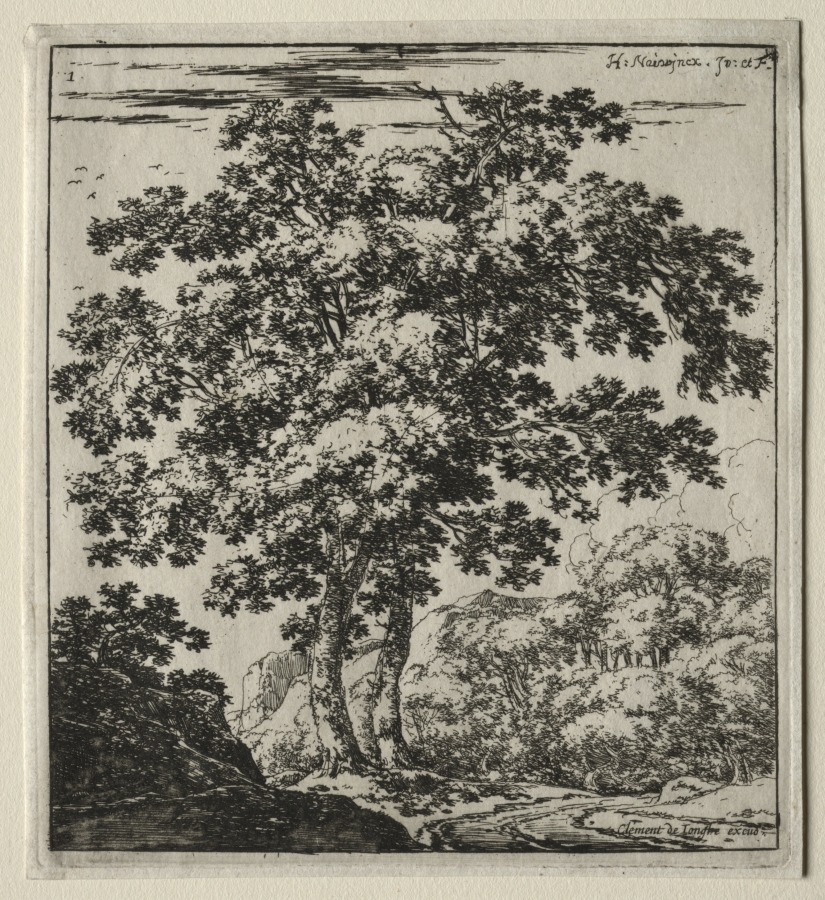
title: Naiwincx Engravings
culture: Flanders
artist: Herman Naiwincx (Flemish, c. 1624–after 1651)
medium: engraving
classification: Print